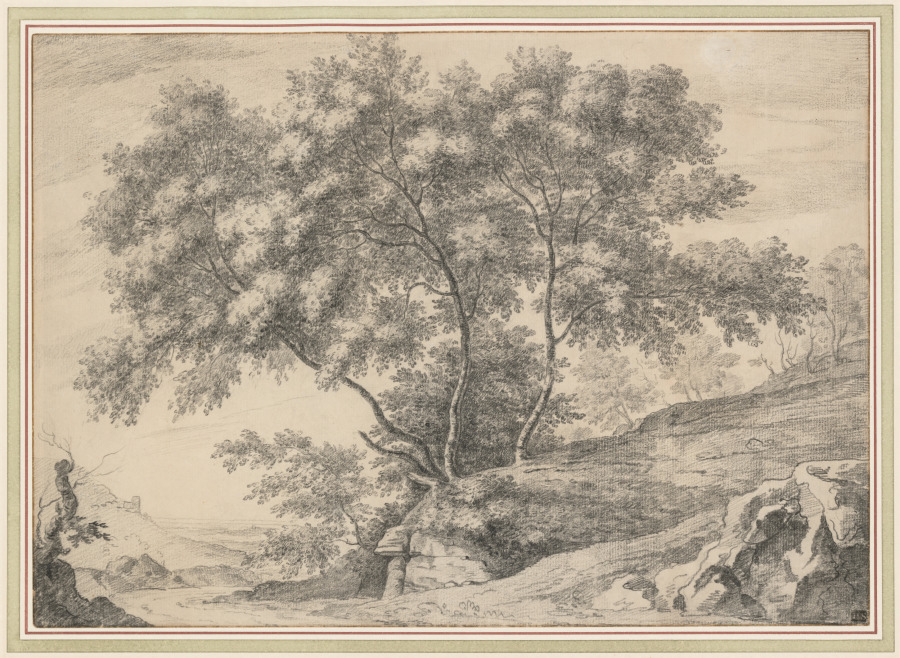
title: A Clump of Trees on a Rocky Outcrop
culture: Britain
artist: John Claude Nattes (British, c. 1765–1839)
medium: Graphite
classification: Drawing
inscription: Verso: Upper right, in graphite: CH/14/1 C[?]/W